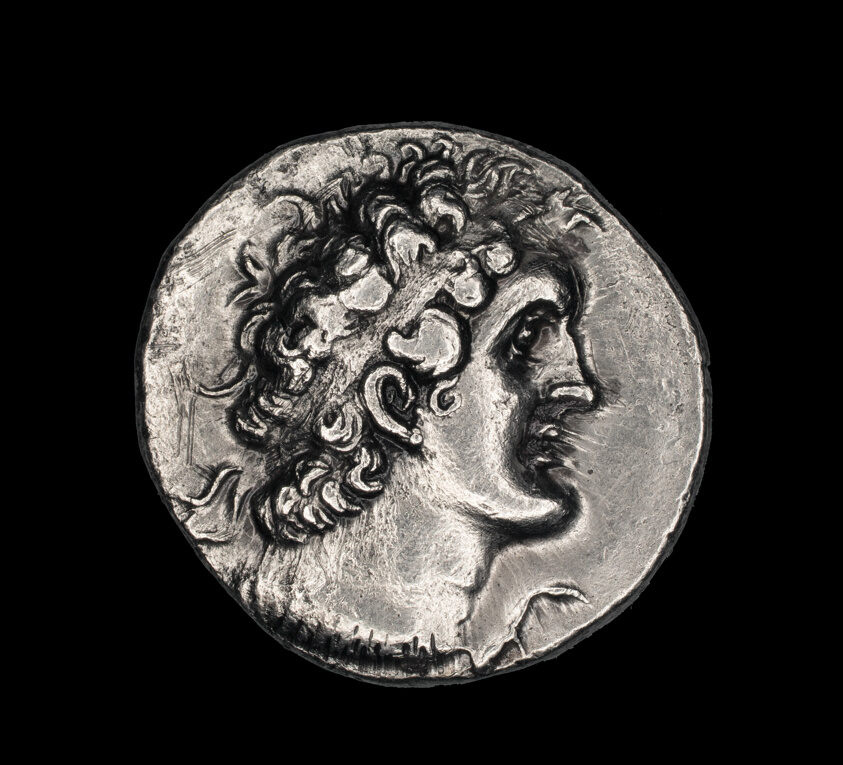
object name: Coin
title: Tetradrachm (Coin) Portraying Ptolemy VIII Euergetes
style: ptolemaic, ancient, greek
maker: Greek, Ptolemaic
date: 146-145 BCE, Reign of Ptolemy VIII Euergetes (146–116 BCE)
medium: Silver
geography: Egypt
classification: coin; ancient art